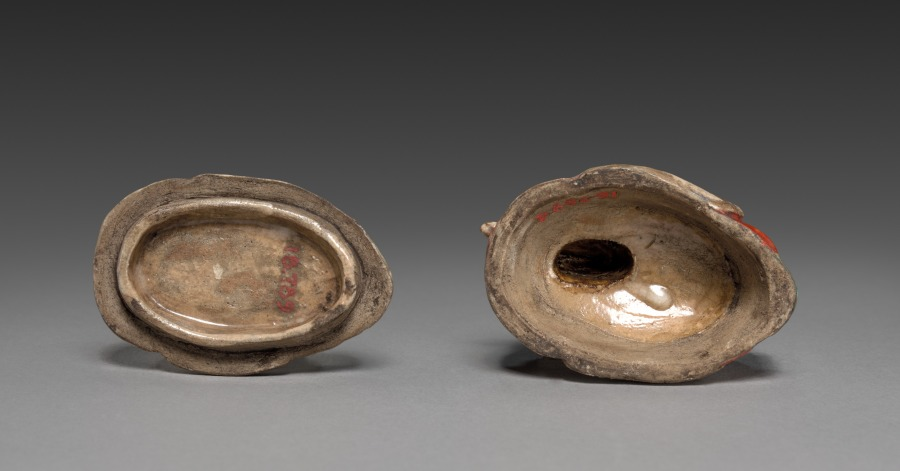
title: Incense Container (Kōgō) in the Shape of a Mandarin Duck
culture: Japan, Edo period (1615–1868)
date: c. 1700–1868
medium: Stoneware with glaze and incised decoration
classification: Ceramic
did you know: The artist incised the bird's feet on the bottom of the box.